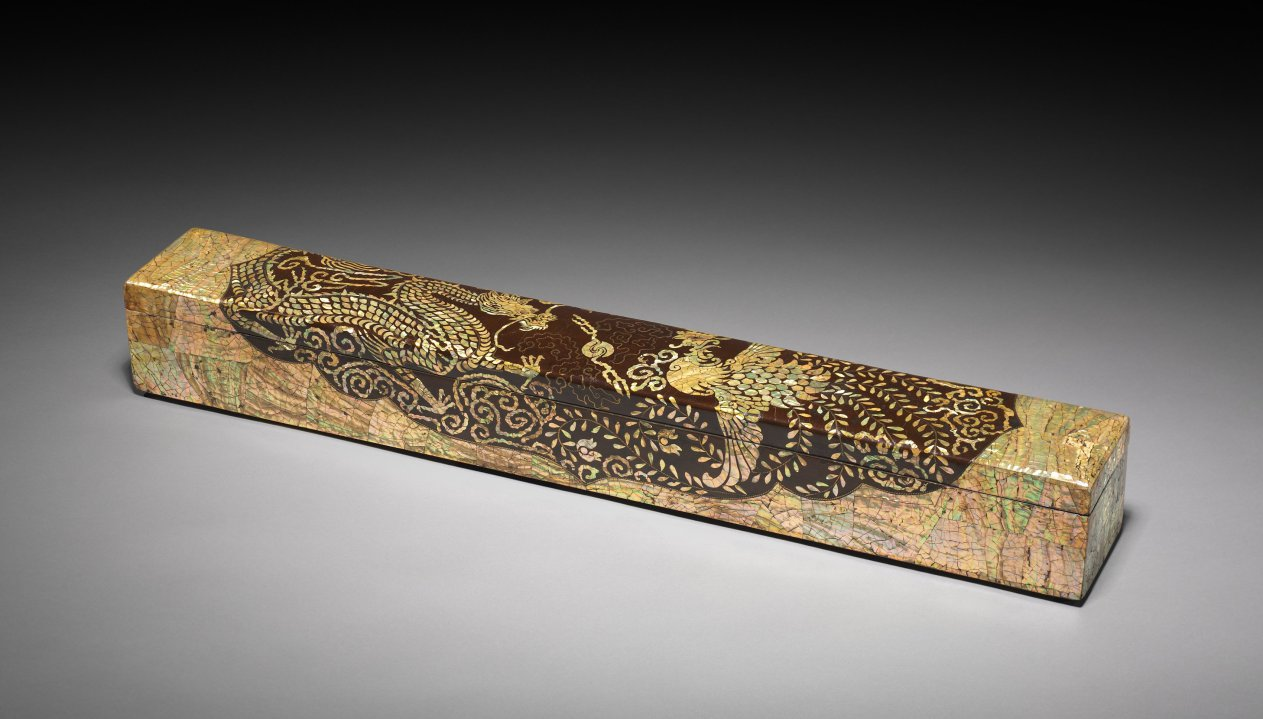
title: Scroll Box with Dragon and Phoenix Design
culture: Korea, Joseon dynasty (1392–1910)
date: 1800s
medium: lacquered wood inlaid with mother-of-pearl and twisted brass and copper wire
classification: Lacquer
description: This large rectangular box was designed for keeping a scroll or an important document. The mother-of-pearl inlaid lacquer rendering of a dragon and phoenix combines texture, color, and shape to produce a dazzling effect. The large and prominent designs of the Joseon-period inlaid lacquer, like on this box, replaced the fine detail and mosaic-like patterns popular in the Goryeo period (918-1392).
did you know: This technique of using the inlays of iridescent mother-of-pearl and abalone shells has been practiced in Korea for over a thousand years,